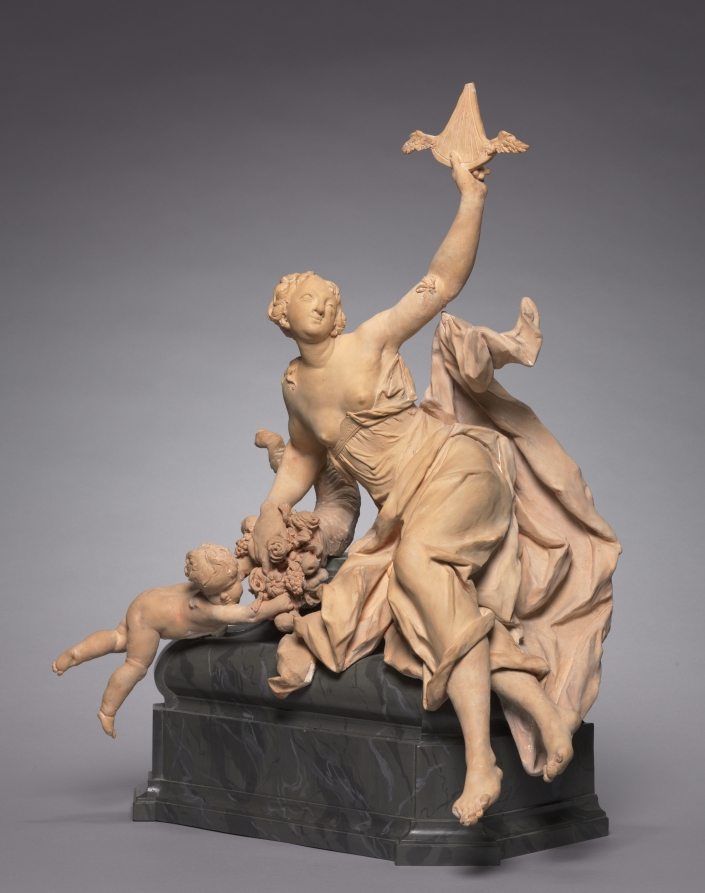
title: Abundance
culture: Austria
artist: attributed to Lorenzo Matielli (Austrian, c. 1688–1748)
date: c. 1730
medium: terracotta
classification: Sculpture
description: This work is probably a model for a garden statue that came from Castle Neuwartenburg near Vocklabruck. Castle Neuwartenburg was built from plans by Domenico Martinelli, with frescoes by Altomonte and sculpted decorations of the doorway and gardens by Lorenzo Matiellli (who also designed the door figures of the Cloisters at Melk and St. Michael's church in Vienna). The completion and dedication of the castle took place in 1732 with a personal visit by Emperor Karl VI. The statue was never executed, and the model remained in the castle.